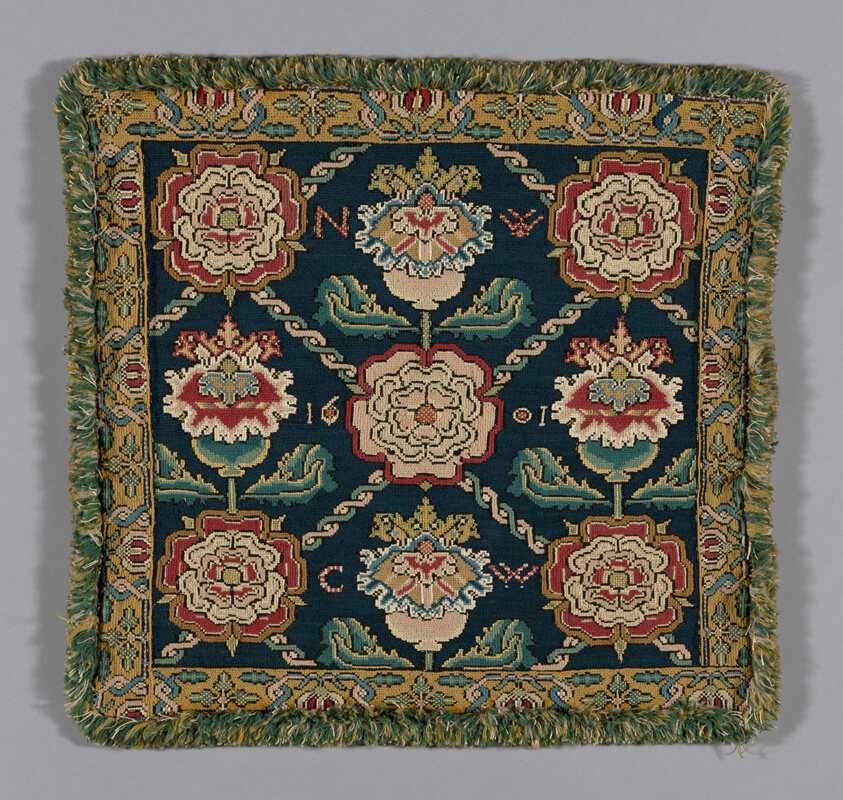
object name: Textile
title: Cushion Cover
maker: England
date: 1601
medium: Linen, plain weave; embroidered with silk, linen, and wool yarns in long-armed cross stitches; edged with wool and linen, plain weave with extended weft cut fringe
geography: England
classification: textile; needlework (visual works)